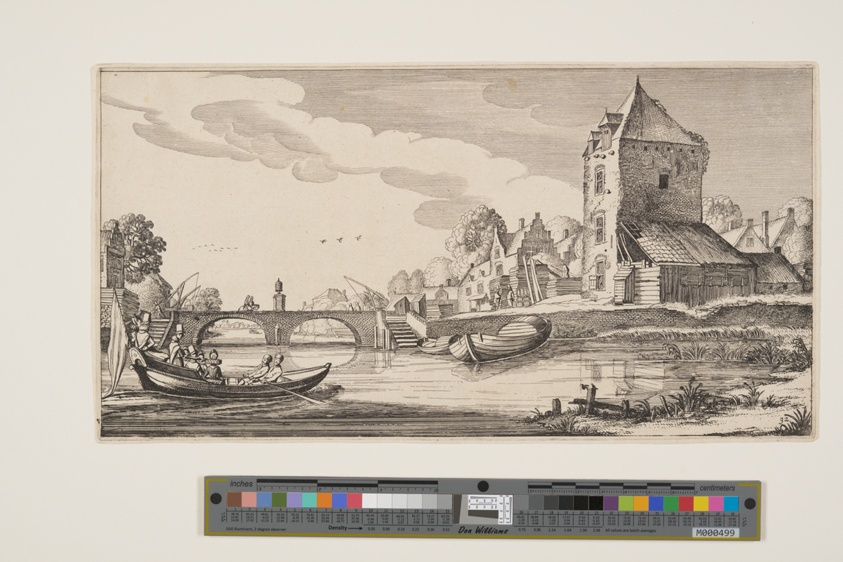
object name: Print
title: Village on a River, from Landscapes (Playsante Lantschappen)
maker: Attributed to Claes Jansz. Visscher II (Dutch, 1586-1652); after Jan van de Velde II (Dutch, c. 1593-1641)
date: c. 1641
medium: Etching, with engraving, on ivory laid paper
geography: Netherlands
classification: etching; paper; print; prints and drawing